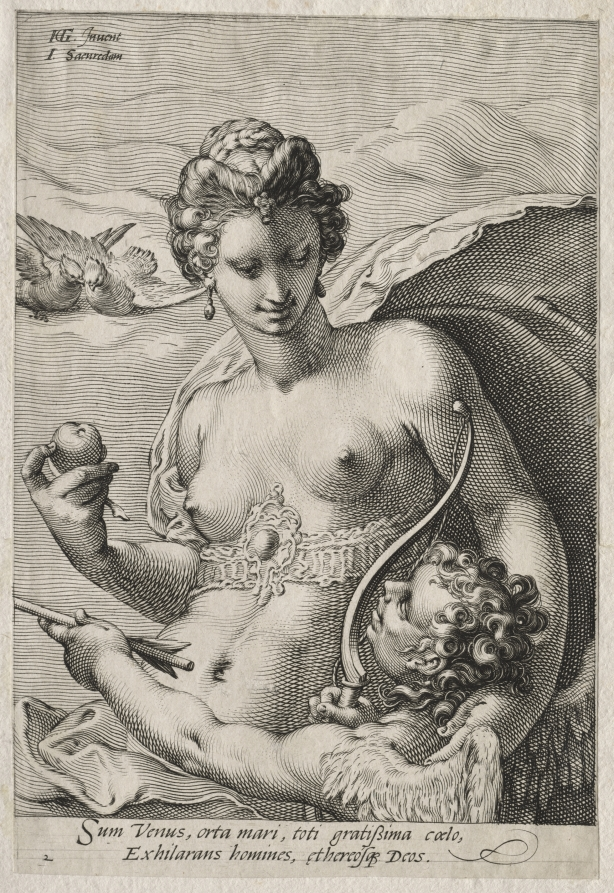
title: Venus and Cupid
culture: Netherlands, 16th century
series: Three Goddesses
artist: Jan Saenredam (Dutch, 1565–1607)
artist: after Hendrick Goltzius (Dutch, 1558–1617)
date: c. 1595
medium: engraving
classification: Print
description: Goltzius popularized a style of engraving with mesmerizing patterns of curving, tapering, and crisscrossing lines; it was especially appreciated in the late 1500s. Designed for his pupil Saenredam to engrave, these prints depict the three goddesses from the tale of The Judgment of Paris, in which each claimed the golden apple awarded to the most beautiful. Jupiter deferred judgment to Paris, a mortal esteemed for his fair-mindedness. Juno and Athena tried to bribe Paris with an empire and skill in war, but Venus made him an offer he could not resist: Helen, the world’s most beautiful woman. The peacock identifies Juno, queen of the gods and the jealous wife (and sister) of Jupiter. Clad in armor, Pallas Athena is the goddess of wisdom, the arts, and warfare; an owl is her sage companion. The presentation of the deities in separate prints suggests that viewers may also play Paris’s role and decide themselves which goddess the artists made most beautiful.